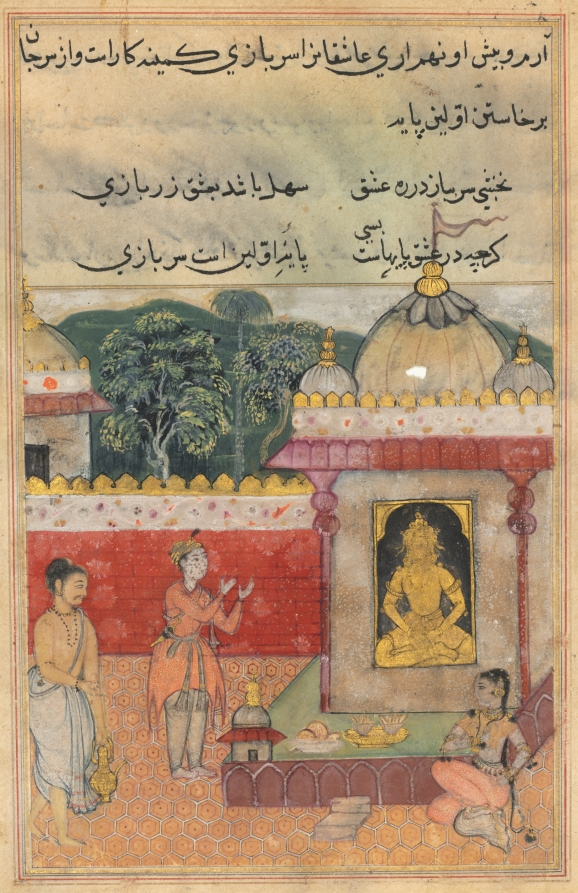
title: The Raja’s son vows to sever his head and offer it to the image if he is united with the princess he has seen in the temple, from a Tuti-nama (Tales of a Parrot): Thirty-fourth Night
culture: Mughal India, court of Akbar (reigned 1556–1605)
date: c. 1560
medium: gum tempera, ink, and gold on paper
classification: Painting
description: The raja’s son, wearing orange, stands with his hands raised in supplication before an enshrined golden image. When he entered the temple for worship, he encountered a princess and instantly became deeply enamored by her beauty. Upon arriving home, his father ensured that the two would be married, although the promised self-sacrifice remained unfulfilled.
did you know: In this painting, intended for a Muslim patron, the sculpture of a Hindu deity lacks a face and hands.